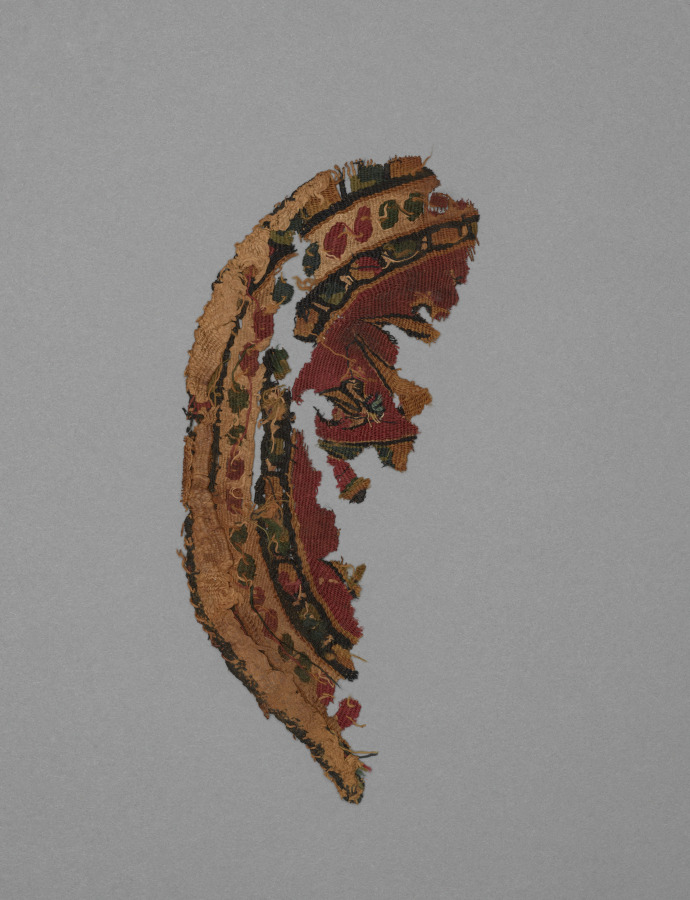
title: Lions from a Tunic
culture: Egypt, Islamic Abbasid period, 8th - 9th Century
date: c. 800's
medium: tapestry weave with supplementary weft wrapping; undyed linen and dyed wool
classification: Textile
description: The royal lions and jeweled border in this colorful roundel, originally from a tunic, conveyed power and wealth. The symmetrical design with lions and ducks flanking the central palmette (fan-shaped plant form) indicates that the pattern was copied from a costlier silk textile woven on a loom that automatically repeated the design in mirror-image symmetry.